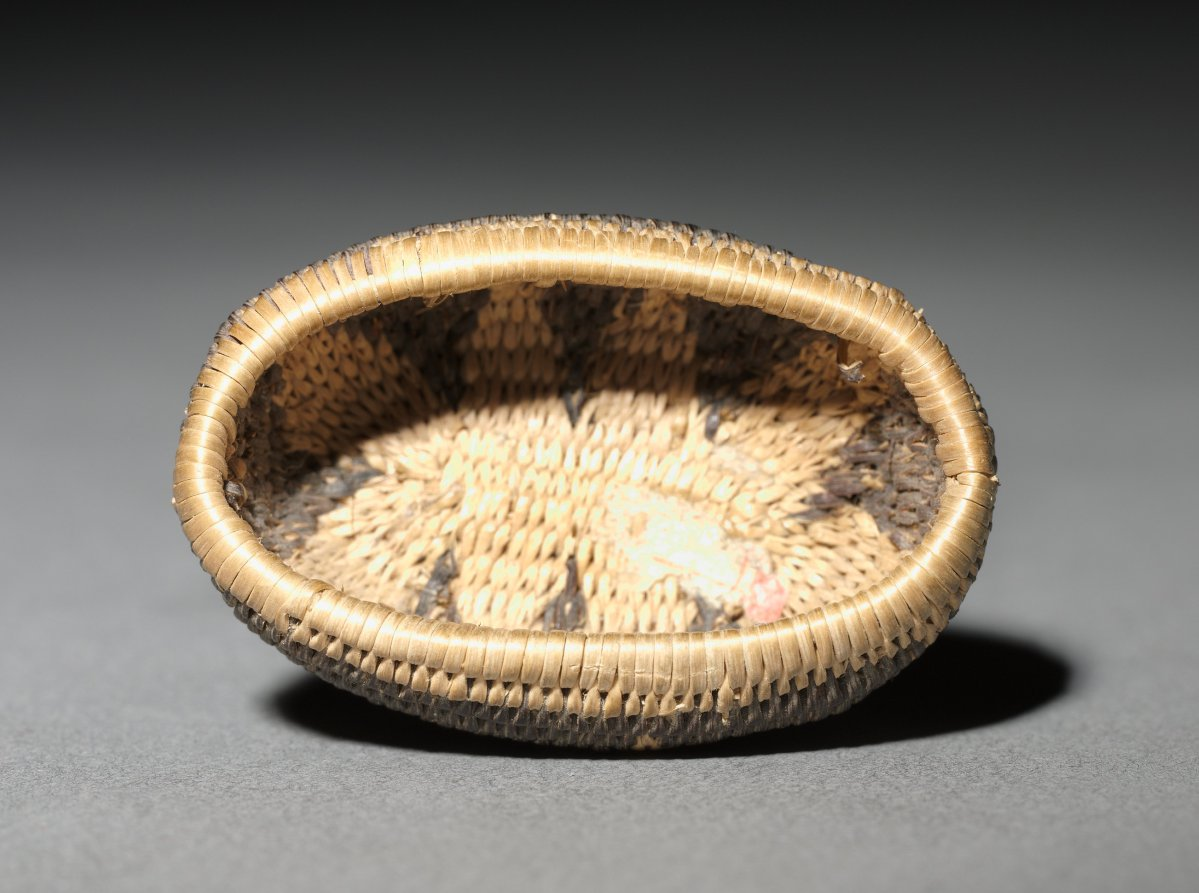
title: Miniature Basket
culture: America, Native North American, Southwest, Arizona, Akimel O'odham (Pima), Unassigned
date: before 1923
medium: plant fiber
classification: Basketry